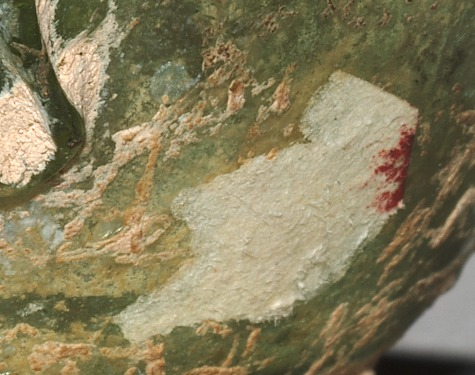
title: Vase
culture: Early Islamic, Eastern Mediterranean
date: 600s–800s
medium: glass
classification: Glass